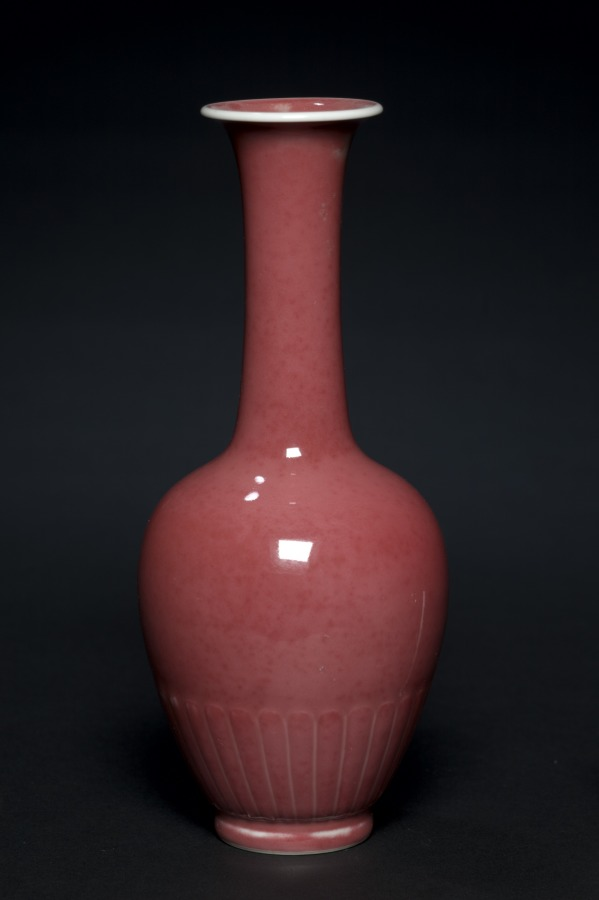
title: Lotus Petal Vase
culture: China, Jiangxi province, Jingdezhen, Qing dynasty (1644-1911), Kangxi period (1662-1722)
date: 1662–1722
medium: porcelain with "peach bloom" glaze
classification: Ceramic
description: The "peach-bloom" glaze developed during the Kangxi era has also been described as "drunken with beauty." Technical achievements were transcended with aesthetic associations, revealing the greatest sensitivity to all things beautiful in nature.